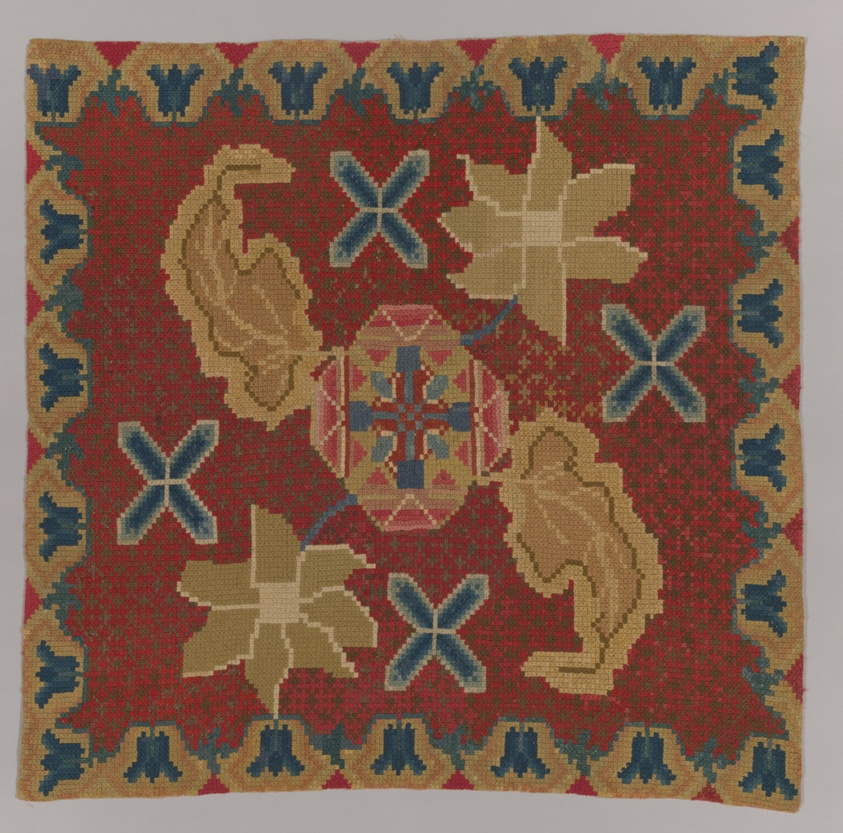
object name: Textile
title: Needlework Rug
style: 18th Century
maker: English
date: 18th century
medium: Wool, canvas, linen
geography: England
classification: needlework - rug; textile; embroidery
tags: flowers, floral motifs, medallions, foliage, squares